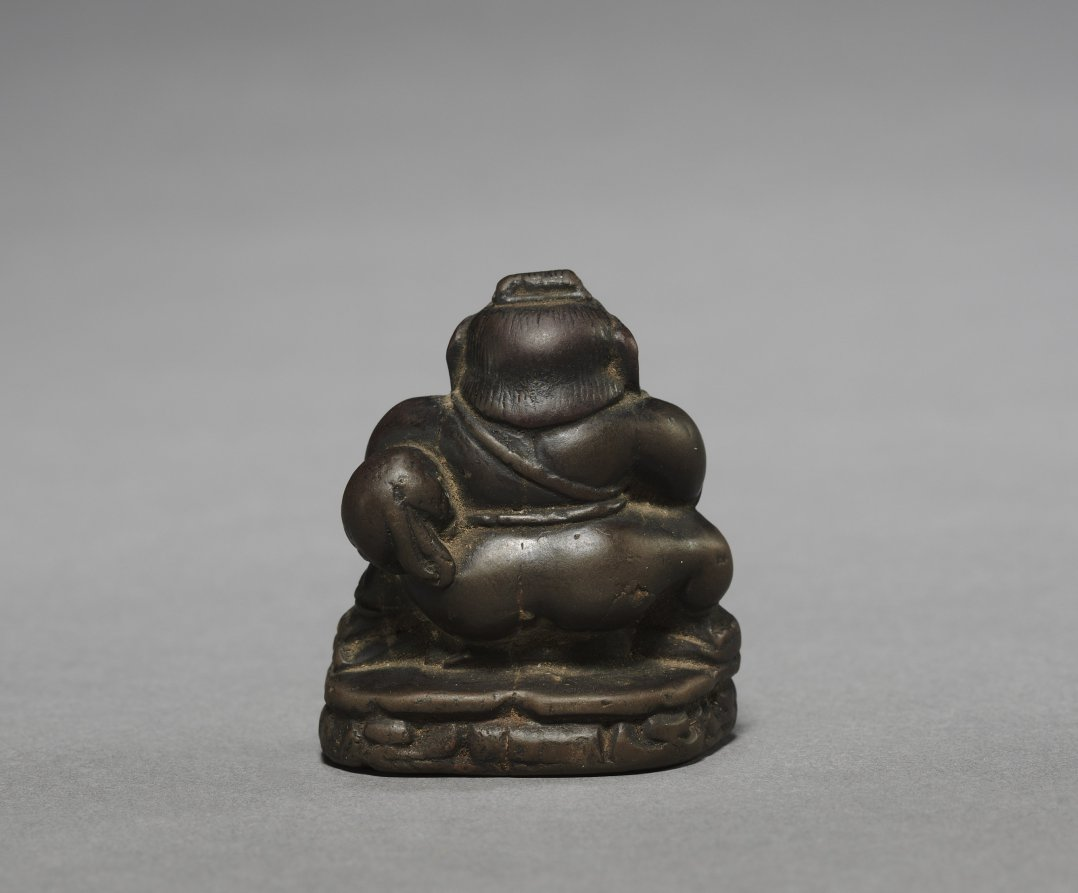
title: Miniature Seated Kubera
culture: Nepal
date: 800s–900s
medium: schist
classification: Sculpture